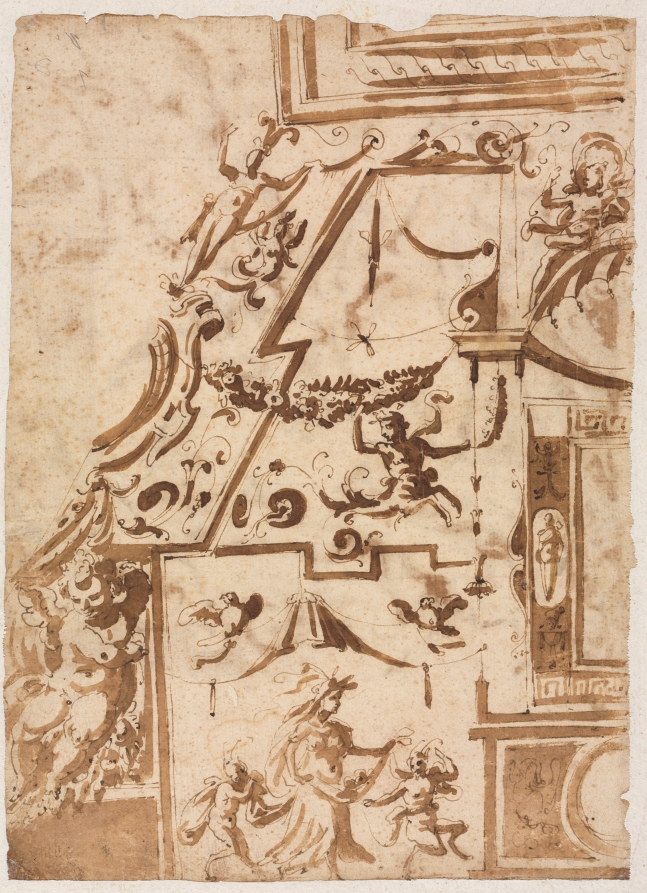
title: Grotesque with a Leaping Centaur (verso)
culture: Italy, 16th century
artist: Marco Marchetti (Italian, 1565–1588)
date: c. 1565/1588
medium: pen and brown ink and brush and brown wash, over traces of black chalk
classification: Drawing